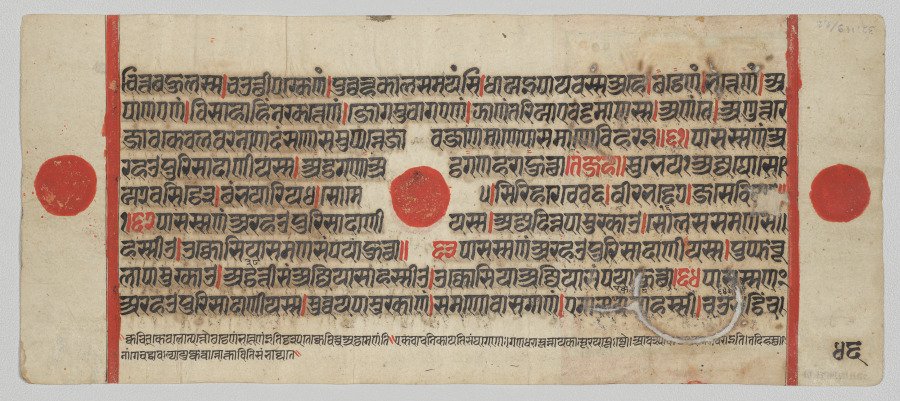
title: Text, Folio 46 (verso), from a Kalpa-sutra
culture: Western India, Gujarat, late 15th-early 16th century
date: c. 1500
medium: Gum tempera, ink, and gold on paper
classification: Painting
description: Parshva stands in a yogic posture of meditation, bearing the hardship of the elements, unmoved. When stormwaters threatened his life, serpents shielded him so that he could complete his meditations and reach liberation. One cobra stretched his seven-hooded canopy over his head like an umbrella, while a serpent king and his wife praise him. The abstract gold lines on the blue background represent the waters that rose to the level of his shoulders. In this painting, the image of Parshva wears a white lower garment, which indicates that this manuscript was made for the prominent branch of Jainism that allows monks and nuns to wear white robes.